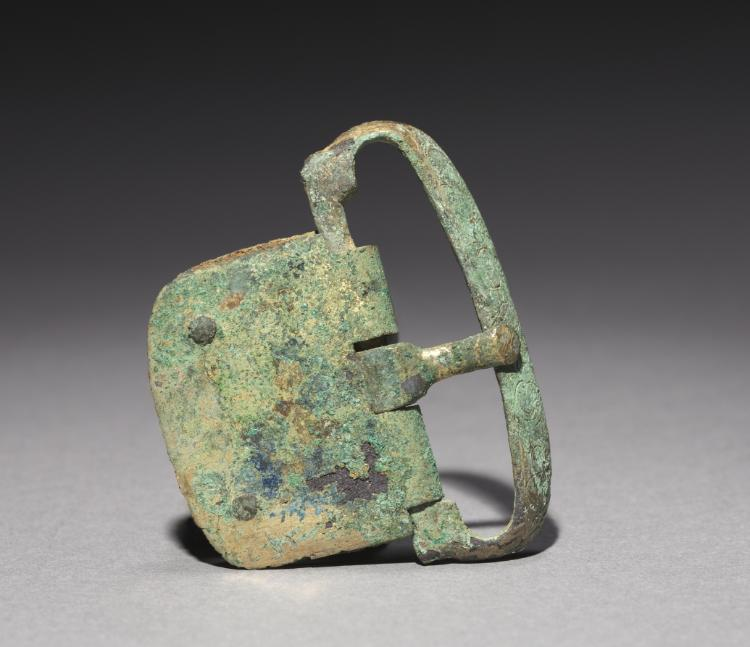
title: Belt Buckle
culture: Korea, Goryeo dynasty (918–1392)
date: 1100s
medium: bronze gilt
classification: Metalwork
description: Metallurgy advanced remarkably in the Goryeo period (918–1392), explaining why a large quantity of sophisticated metal artifacts with delicate designs were used not only as daily accessories but also as burial goods. Belt buckles like this one were attached to leather belts.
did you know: The Japanese antique dealer Yamanaka & Company, which opened its branches in New York (1895) and Boston (1899), sold small Korean archaeological materials such as this belt buckle to American collectors in the early 20th century.